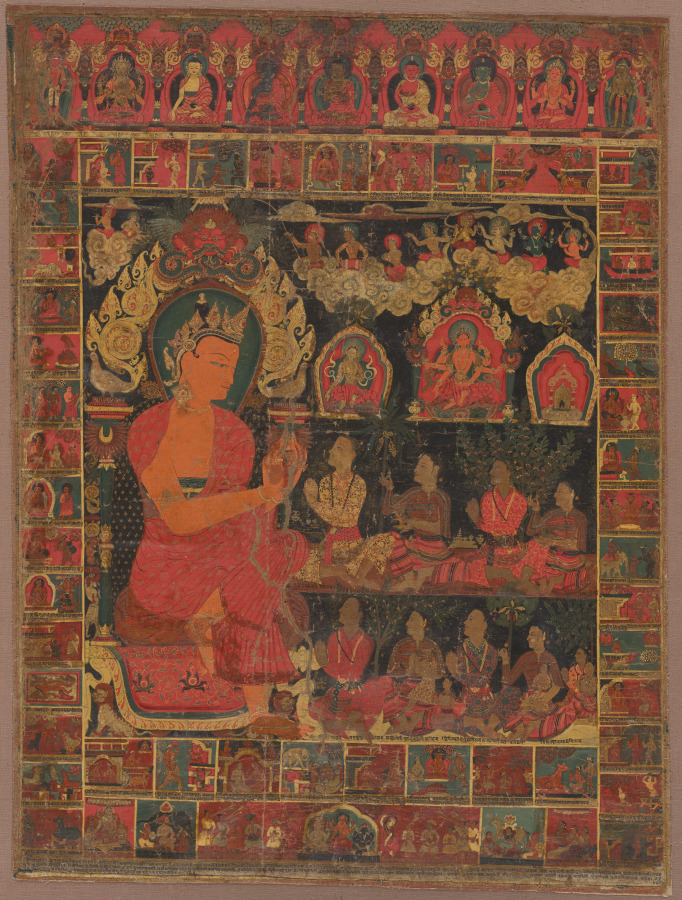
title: Bejeweled Buddha Preaching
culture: Nepal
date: 1648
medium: Gum tempera, ink, and gold on cloth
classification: Painting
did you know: Nepalese devotional paintings on cloth are called "paubha" in the Newari language.